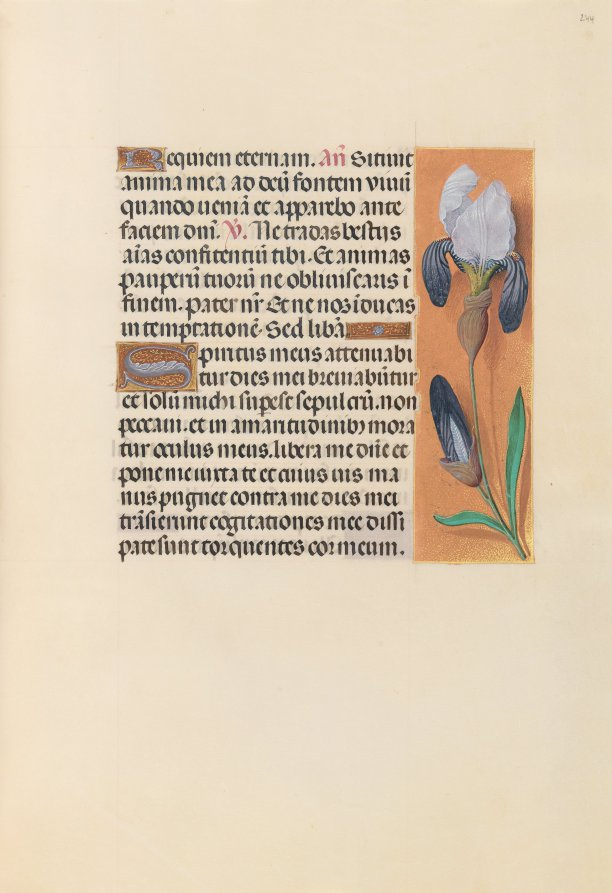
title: Hours of Queen Isabella the Catholic, Queen of Spain: Fol. 244r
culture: Flanders, Ghent and Bruges, late 15th century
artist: Master of the First Prayerbook of Maximillian (Flemish, c. 1444–1519)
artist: and Associates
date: c. 1500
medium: ink, tempera, and gold on vellum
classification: Bound Volume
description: This manuscript was illuminated by a circle of at least five highly organized manuscript painters active in the Flemish cities of Ghent and Bruges. The principal illuminator was Alexander Bening, who painted the majority of the book's miniatures. Manuscripts produced by this circle of artists are renowned for the decoration of their borders, which typically feature a rich variety of realistically-painted flowers, birds, and butterflies. This prayer book, called a book of hours, was intended not for a cleric, but for the private devotions of a lay person-in this case, Isabella the Catholic, Queen of Spain (1451-1504). Isabella's coat of arms embellishes the book's frontispiece. It is unlikely that the book was commissioned by the Queen herself; rather, she probably received it as a diplomatic gift from someone courting her patronage, perhaps Cardinal Francisco Jimenez de Cisneros. A Franciscan friar, Jimenez was dependent upon Isabella for his advancement, first to the post of Queen's confessor in 1492, and then to Archbishop of Toledo in 1495.